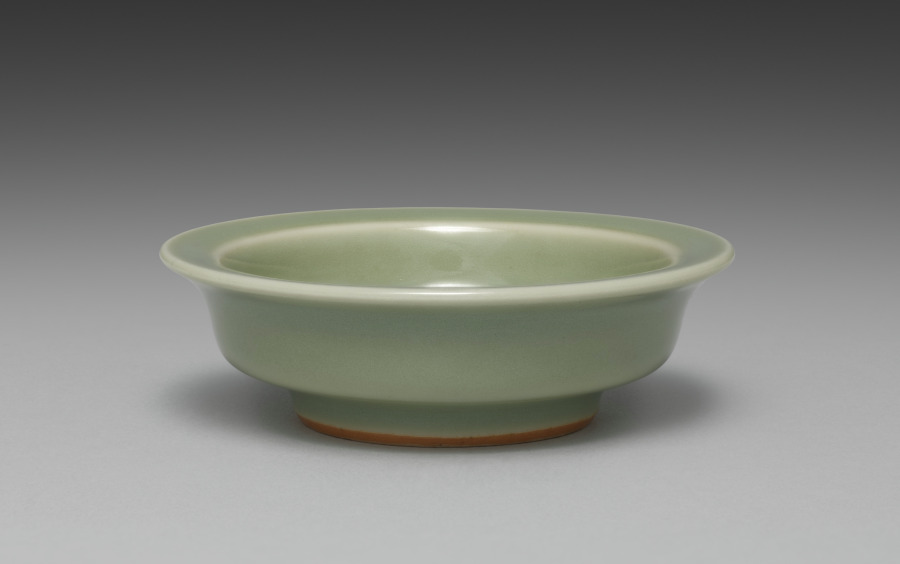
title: Saucer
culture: Japan, Meiji period (1868–1912)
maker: Seifū Yohei III (Japanese, 1851–1914)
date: 1893–1914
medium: One from a set of ten dishes; porcelain with green glaze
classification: Ceramic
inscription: 清風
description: Yohei III’s main output for his sophisticated clientele was in the form of tea sets and dining sets. He created a range of dishes in green glazes. He often produced in pairs, sets of five, or sets of ten. For this set of ten small dishes in a simple, round form that emphasizes the glaze above all, the box lid designates the piece as seiji, or green-glazed porcelain, using a general term for the extensive palette of green glazes often called celadon in English. The box lid further identifies the dishes themselves as tōchō, literally “bean-sized saucers,” a size that makes them suitable for dipping sauces.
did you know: The ten dishes in this set are stored in stacks of five in a two-compartment box.